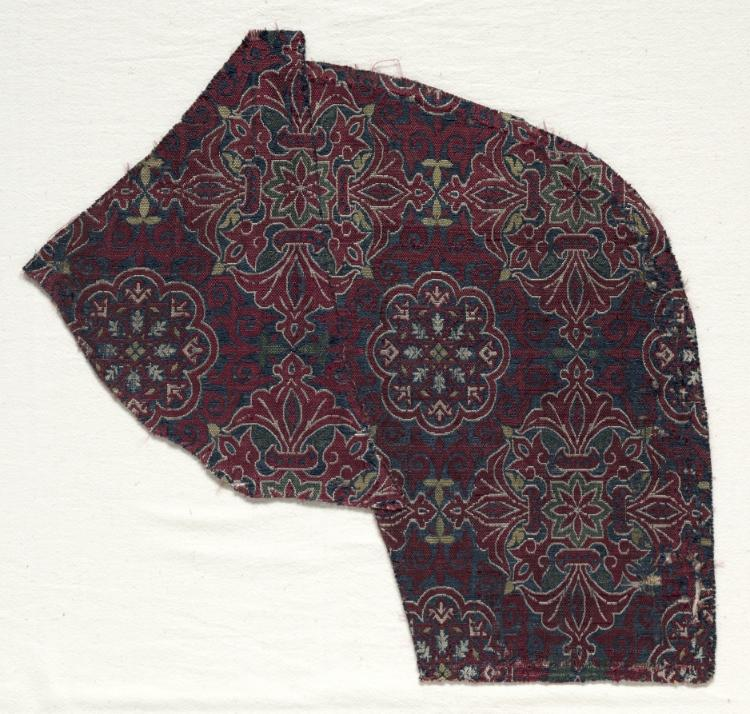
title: Lampas fragment with foliate medallions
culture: Spain, Granada, Nasrid period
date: 1300–1499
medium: lampas: silk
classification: Textile